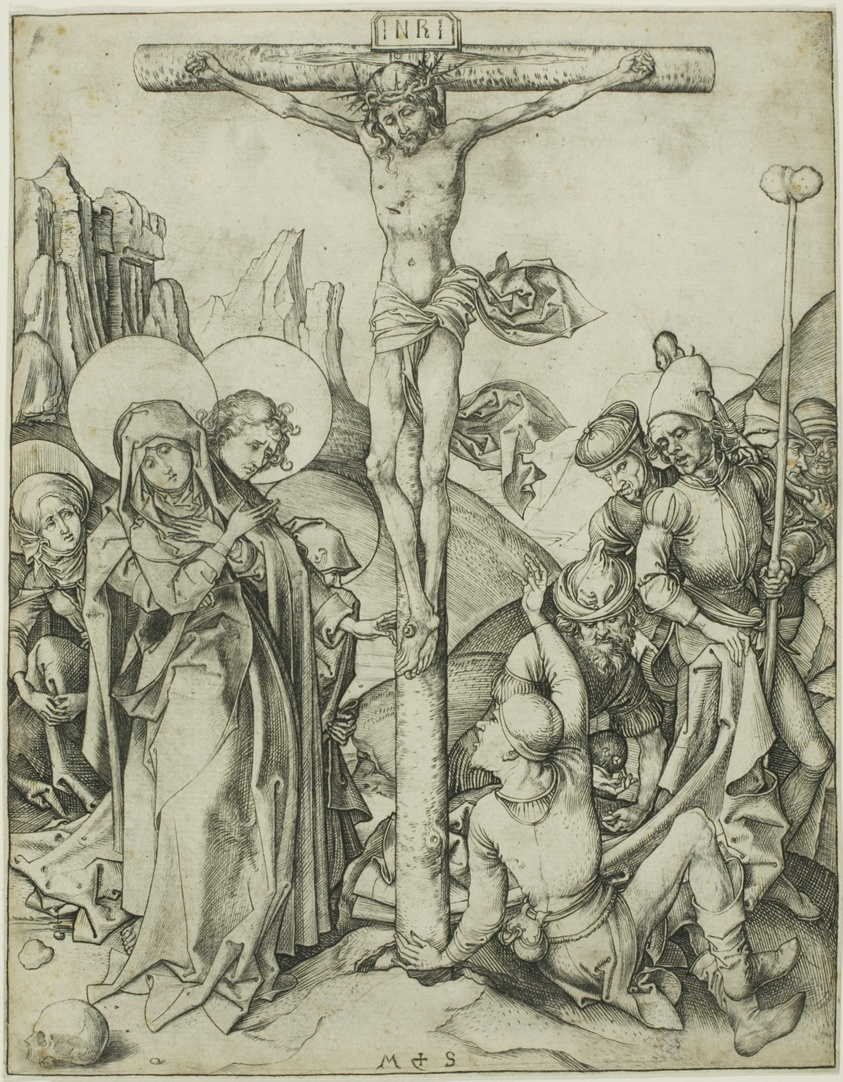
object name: Print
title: The Crucifixion with the Holy Women, St. John and Roman Soldiers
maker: Martin Schongauer (German, c. 1430/50-1491)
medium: Engraving on paper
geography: Germany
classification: engraving; print; prints and drawing